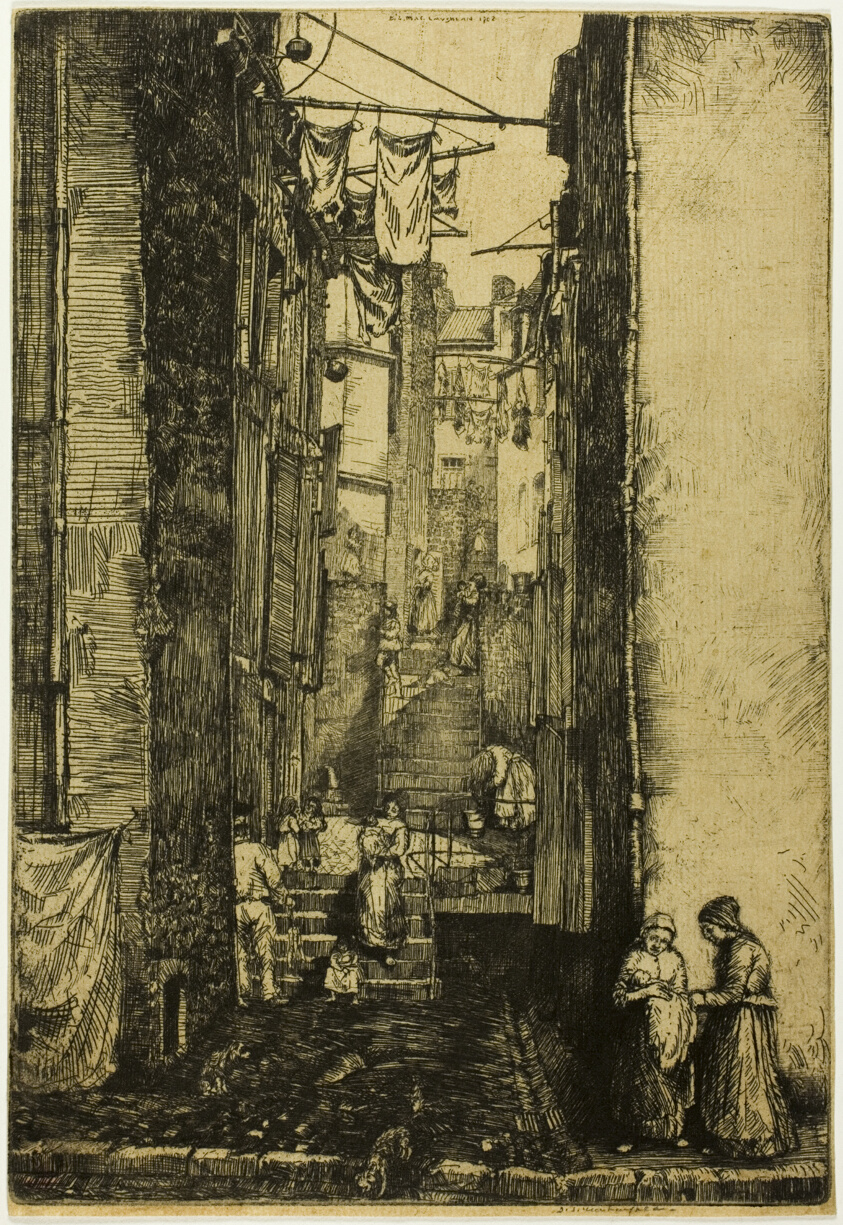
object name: Print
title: Ruelle du Pêcheur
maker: Donald Shaw MacLaughlan (American, born Canada, 1876-1938)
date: 1902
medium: Etching in black on cream laid paper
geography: United States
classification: etching; print; prints and drawing